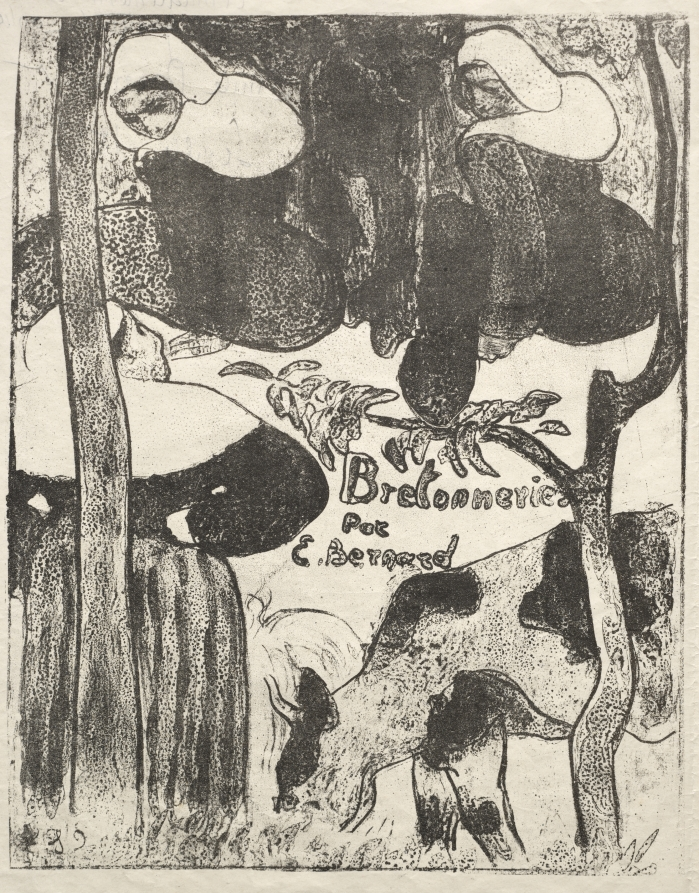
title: Les Bretonneries: Title Page (Page de Titre)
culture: France, 19th century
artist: Émile Bernard (French, 1868–1941)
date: 1889, printed 1896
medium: zincograph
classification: Print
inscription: inscribed on verso of title page: A Don Ignatio Zuloago/ Amicalement et/ avec Grattitude artistique/ Emile Bernard/ Seville 1897